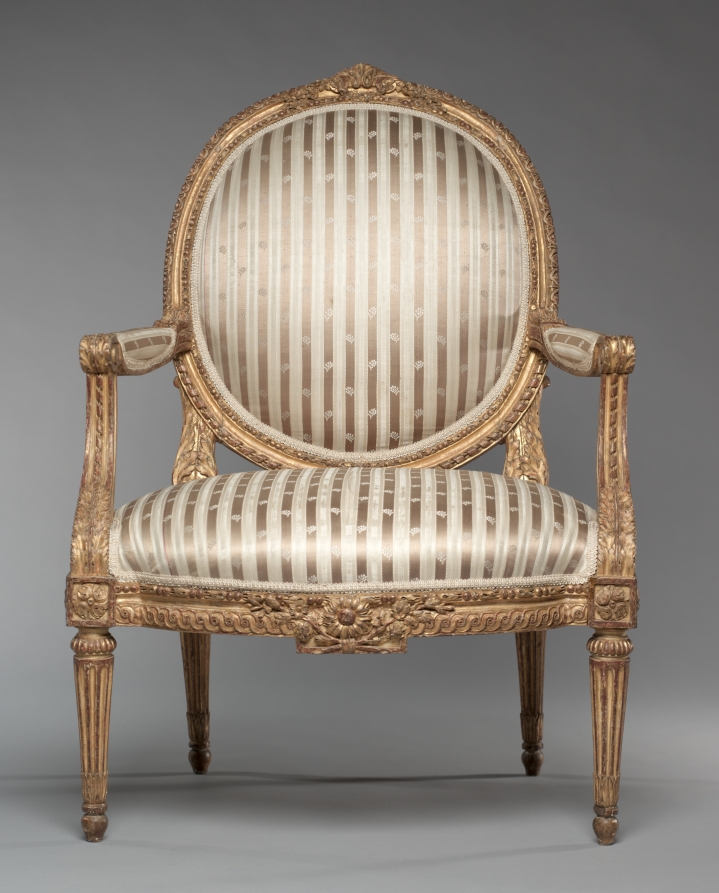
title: Armchair (Fauteuil) (2 of 2)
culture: France, 18th century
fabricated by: Jean-Baptiste II Tilliard (French, 1797)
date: c. 1765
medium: carved and gilded wood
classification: Furniture and woodwork